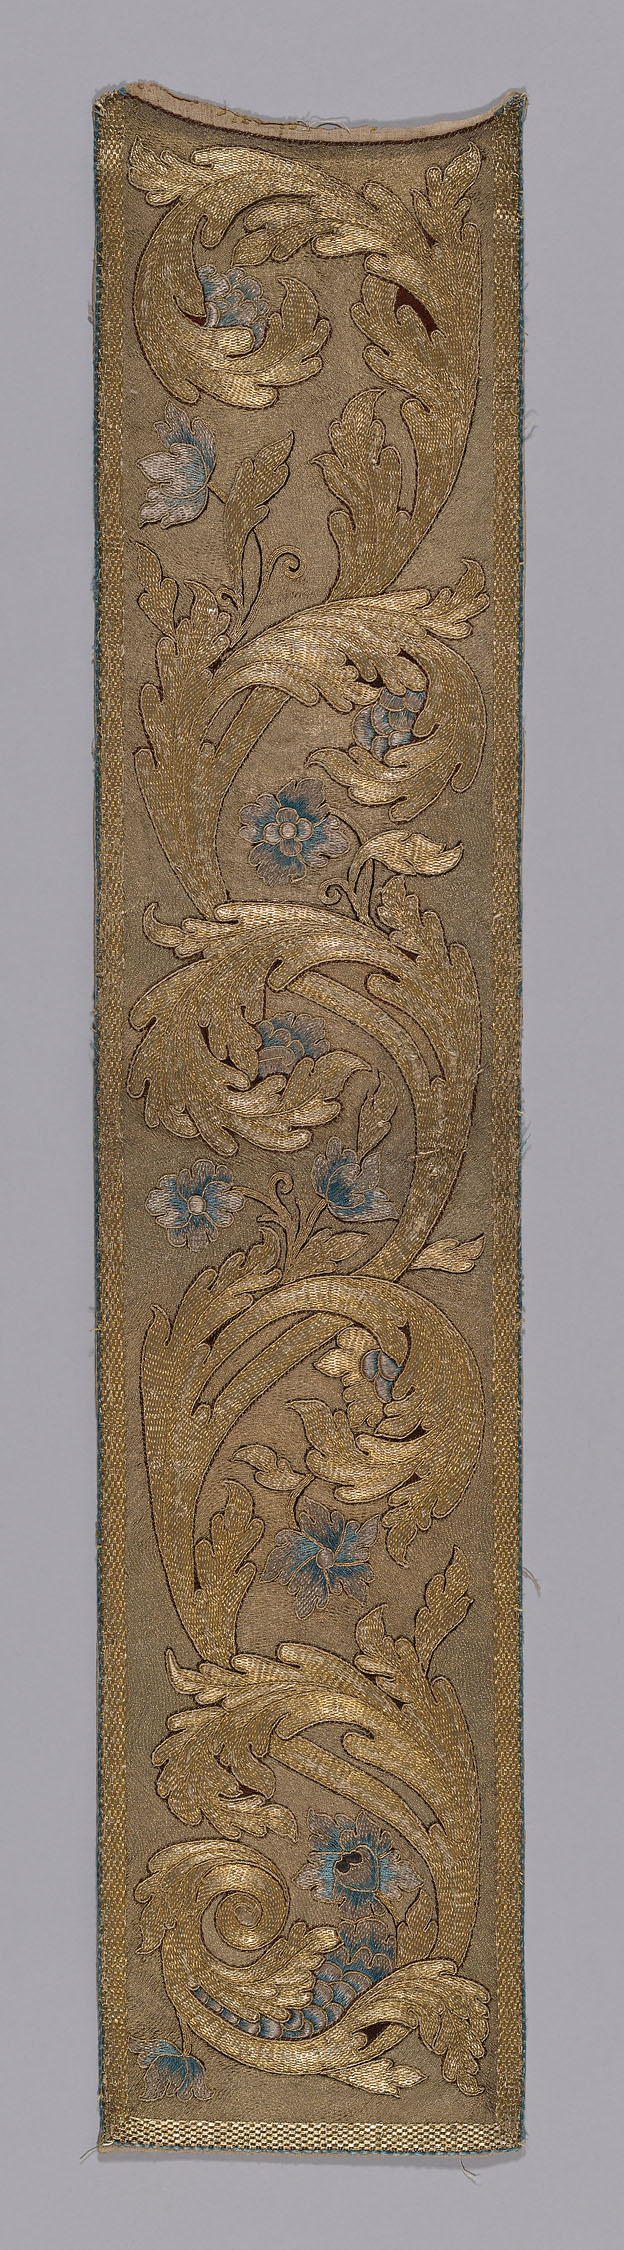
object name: Textile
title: Orphrey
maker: Italy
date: 17th century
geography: Italy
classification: textile; needlework (visual works); liturgical